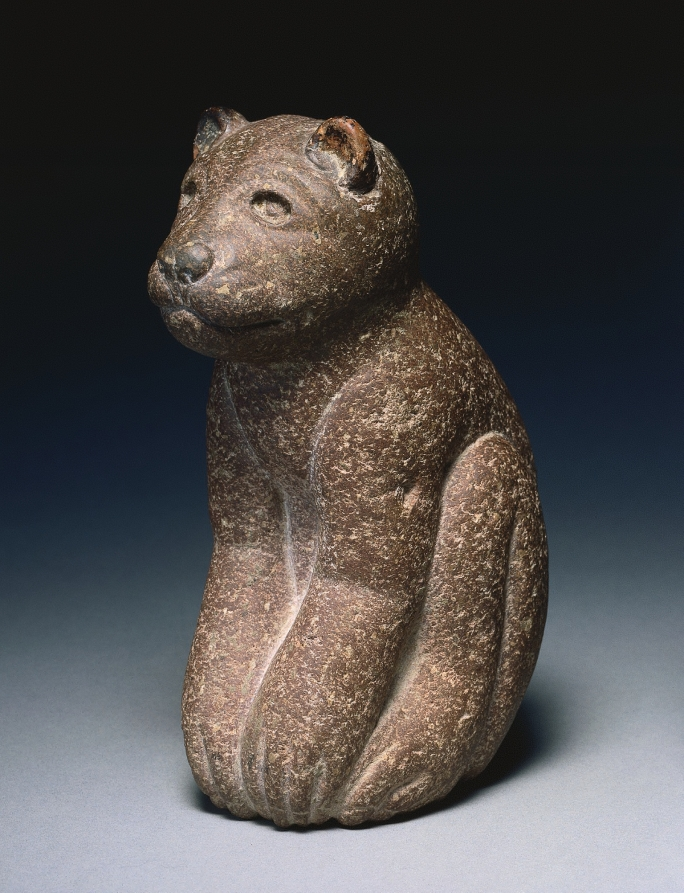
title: Feline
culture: Central Mexico, Aztec, 13th-16th century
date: c. 1200–1519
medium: stone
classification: Sculpture